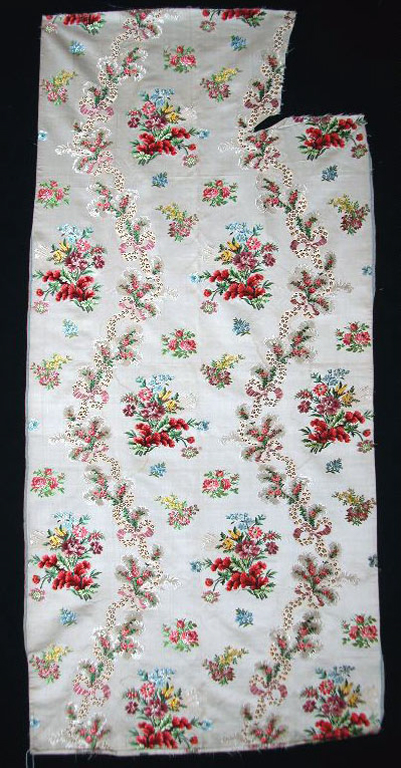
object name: Textile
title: Panel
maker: France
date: c. 1760s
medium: Silk, warp-float faced 7:1 satin weave with supplementary brocading wefts and self-patterned by ground weft floats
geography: France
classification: textile; weaving